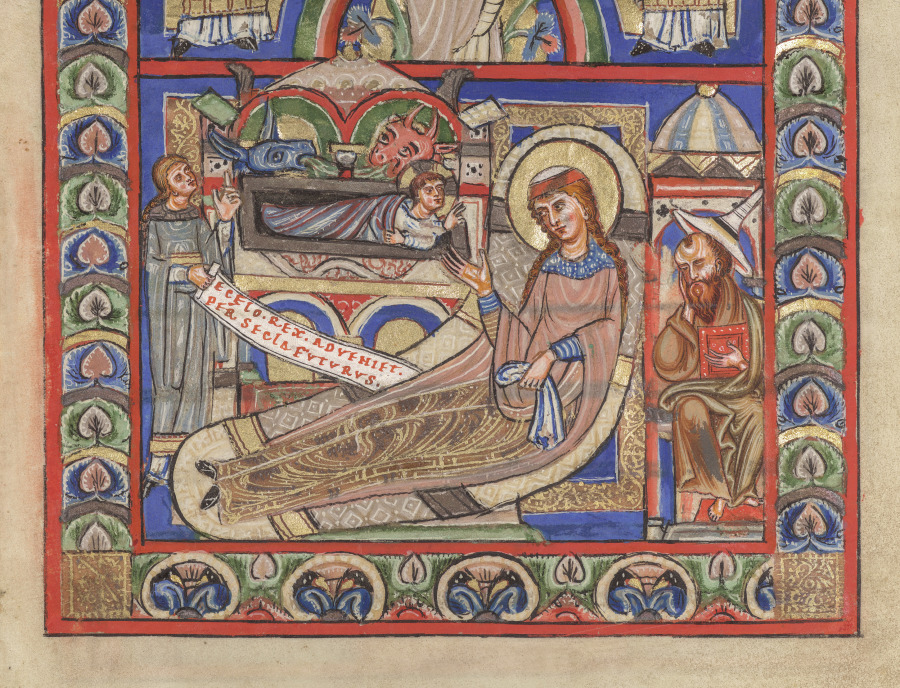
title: Single Leaf Excised from a Gospel Book: The Nativity (recto)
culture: Germany, Helmarshausen Abbey, 12th century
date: c. 1190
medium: ink, tempera, silver, and gold on vellum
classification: Manuscript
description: This leaf comes from a volume that is preserved in the Trier Cathedral Library in Germany (Codex 142).